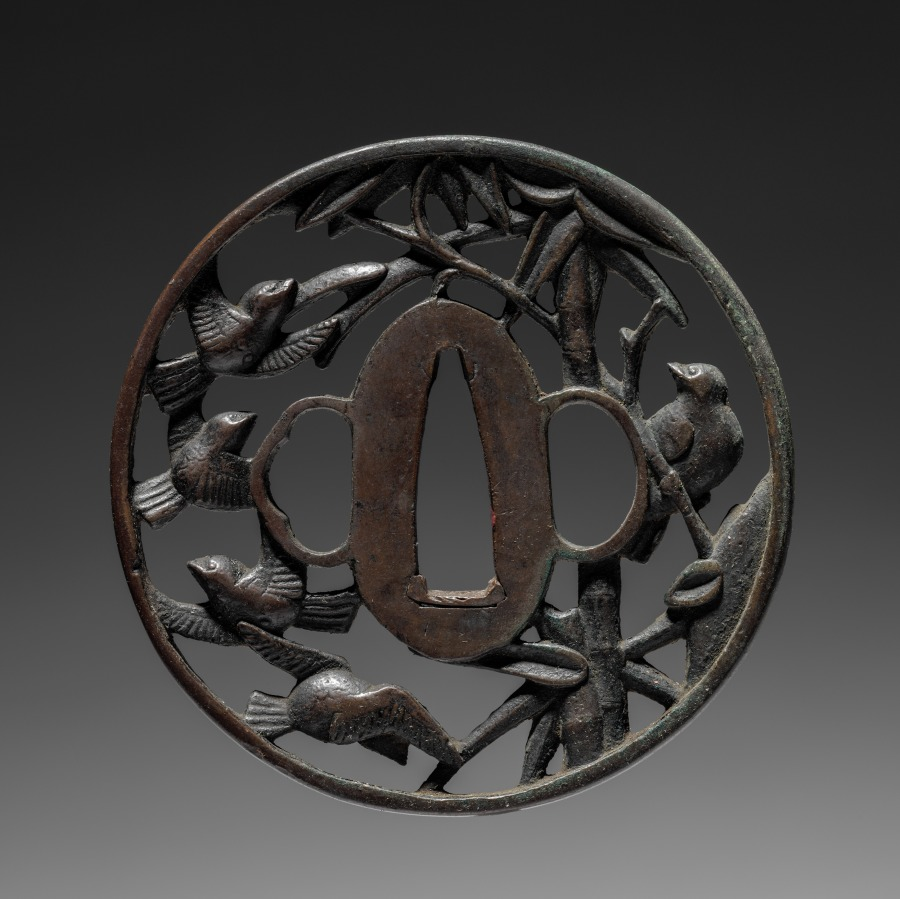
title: Sword Guard (Tsuba) with Birds in Bamboo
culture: Japan, possibly Edo period (1615-1868)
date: c. 1615–1868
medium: bronze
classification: Arms and Armor